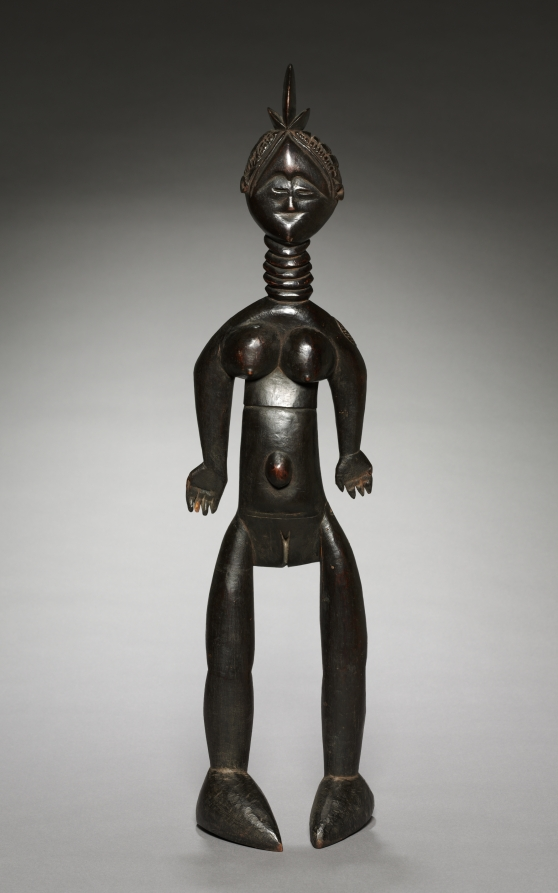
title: Female Figure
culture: Africa, West Africa, Sierra Leone, Mende or Bullom style, unknown maker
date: early 1900s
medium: wood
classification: Sculpture